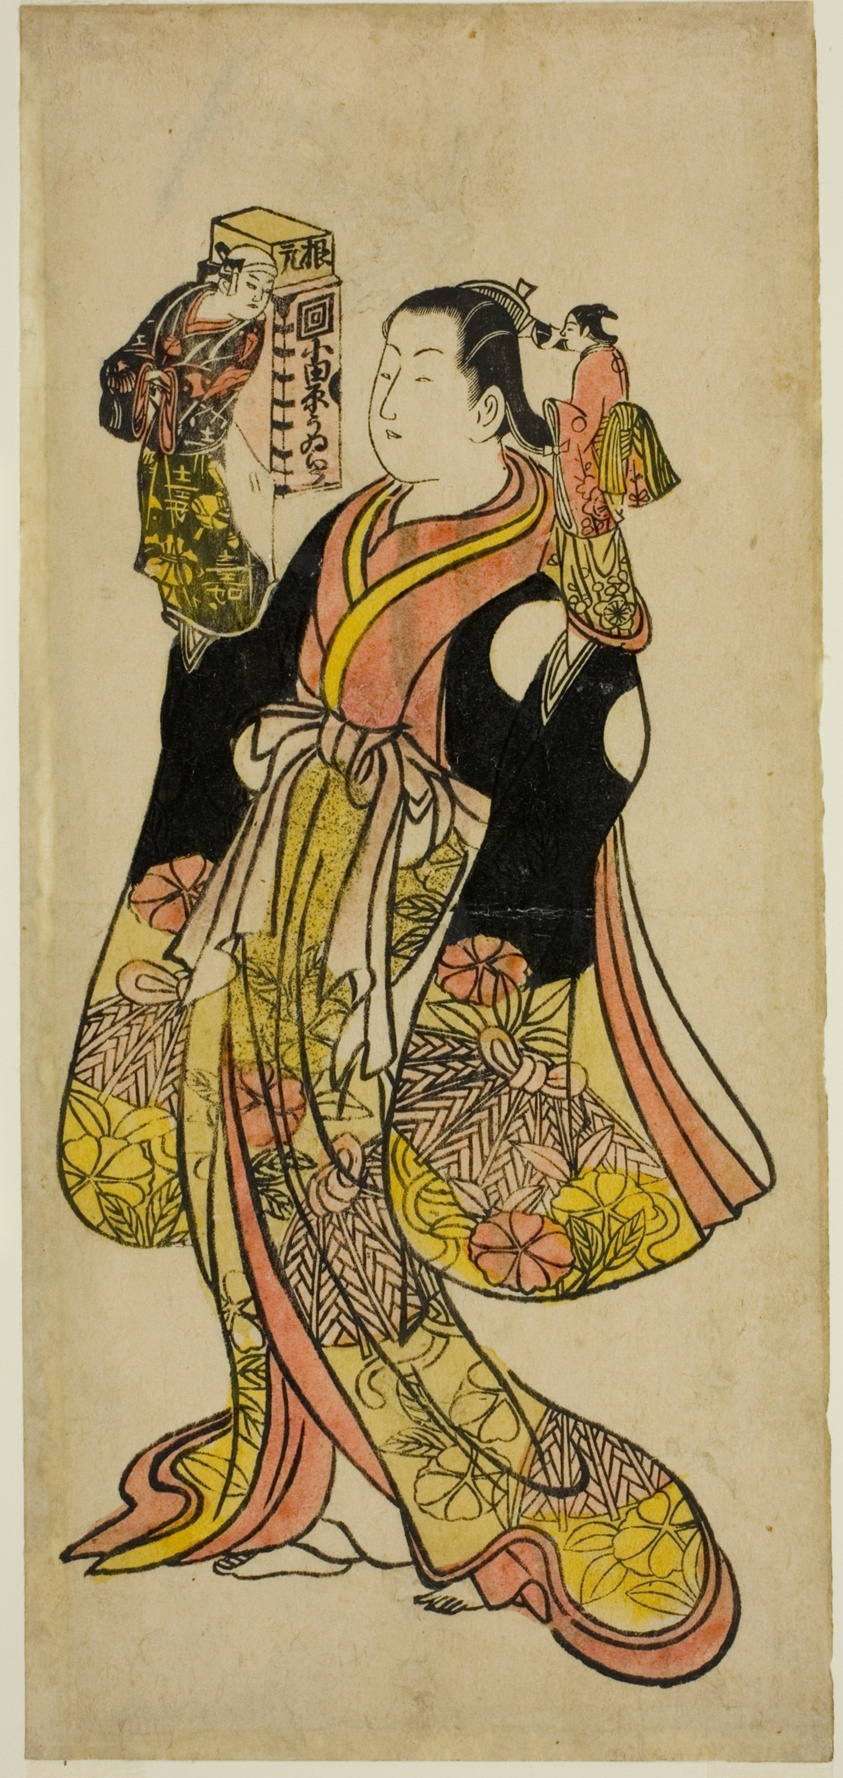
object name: Print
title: Puppeteer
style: Japanese (culture or style)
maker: Attributed to Okumura Toshinobu; Japanese, active c. 1717-50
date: c. 1730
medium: Hand-colored woodblock print; hosoban, urushi-e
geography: Japan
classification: woodblock print; print; asian art